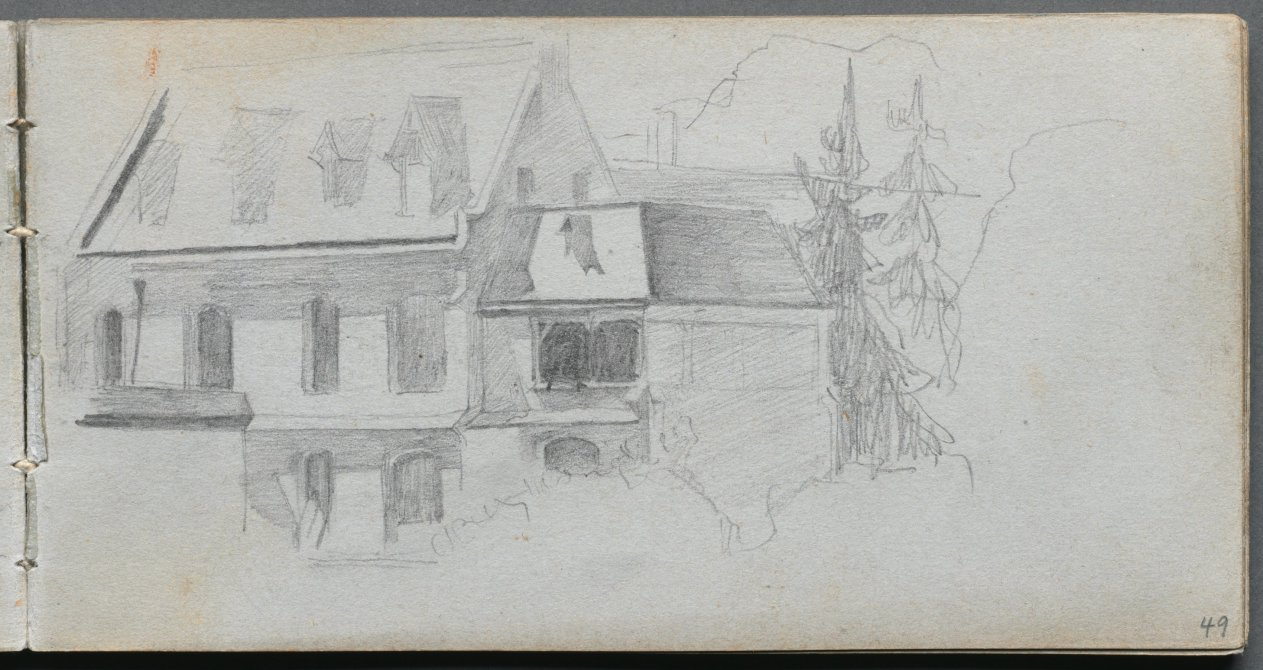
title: Sketchbook, page 49: Architechural Study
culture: France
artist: Ernest Meissonier (French, 1815–1891)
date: c. 1860s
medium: graphite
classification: Bound Volume